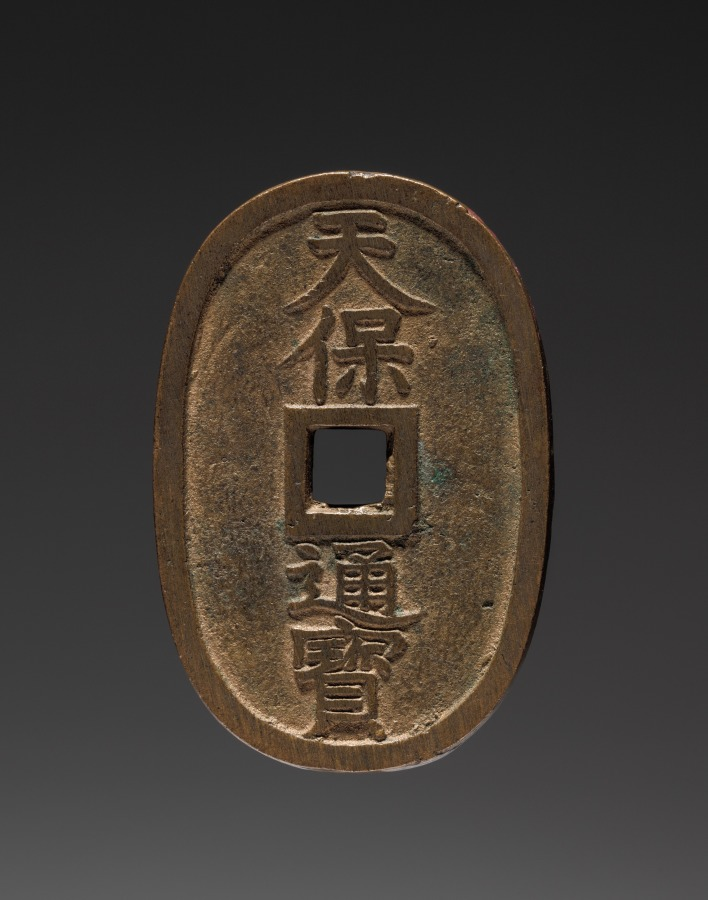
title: Tenpō Tsūhō Coin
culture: Japan, Edo period (1615–1868)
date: 1835–68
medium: copper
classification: Coins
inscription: 天保通寶